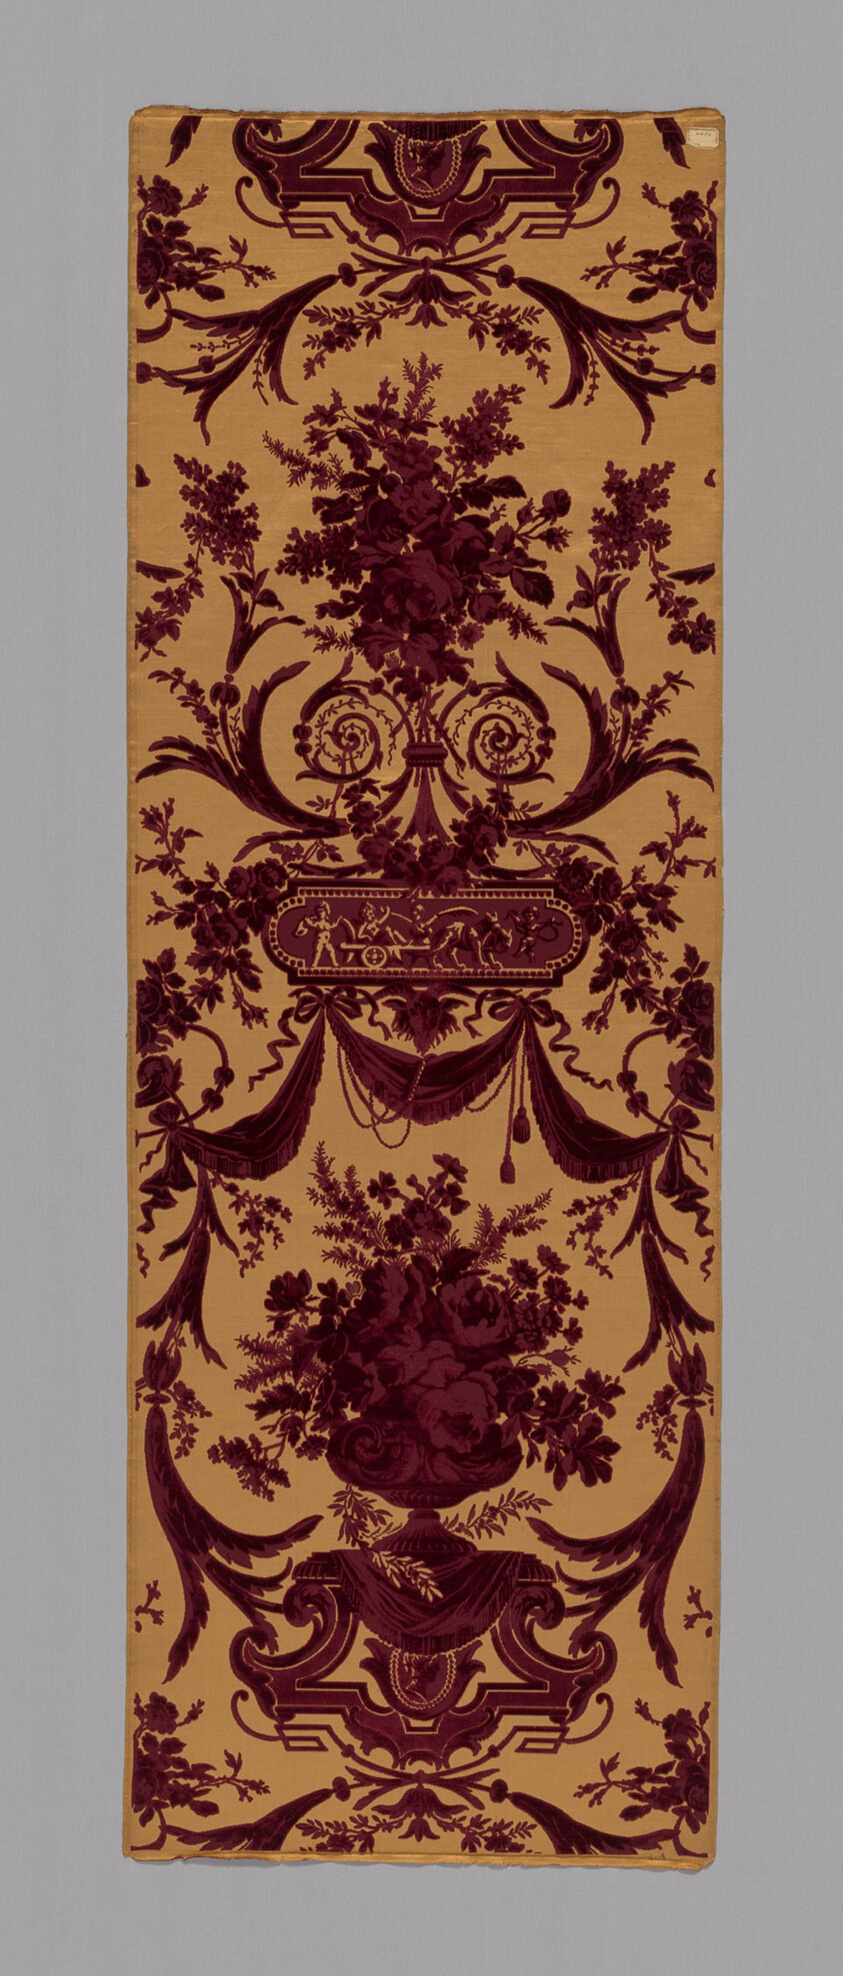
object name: Textile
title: Panel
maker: Produced by Mathevon et Bouvard (French, 1810–1895); France, Lyon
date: 1860/80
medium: Silk, satin weave with supplementary pile warps forming cut and uncut voided velvet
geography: Lyon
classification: textile; weaving - velvet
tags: swags, cupids, flowers, foliage